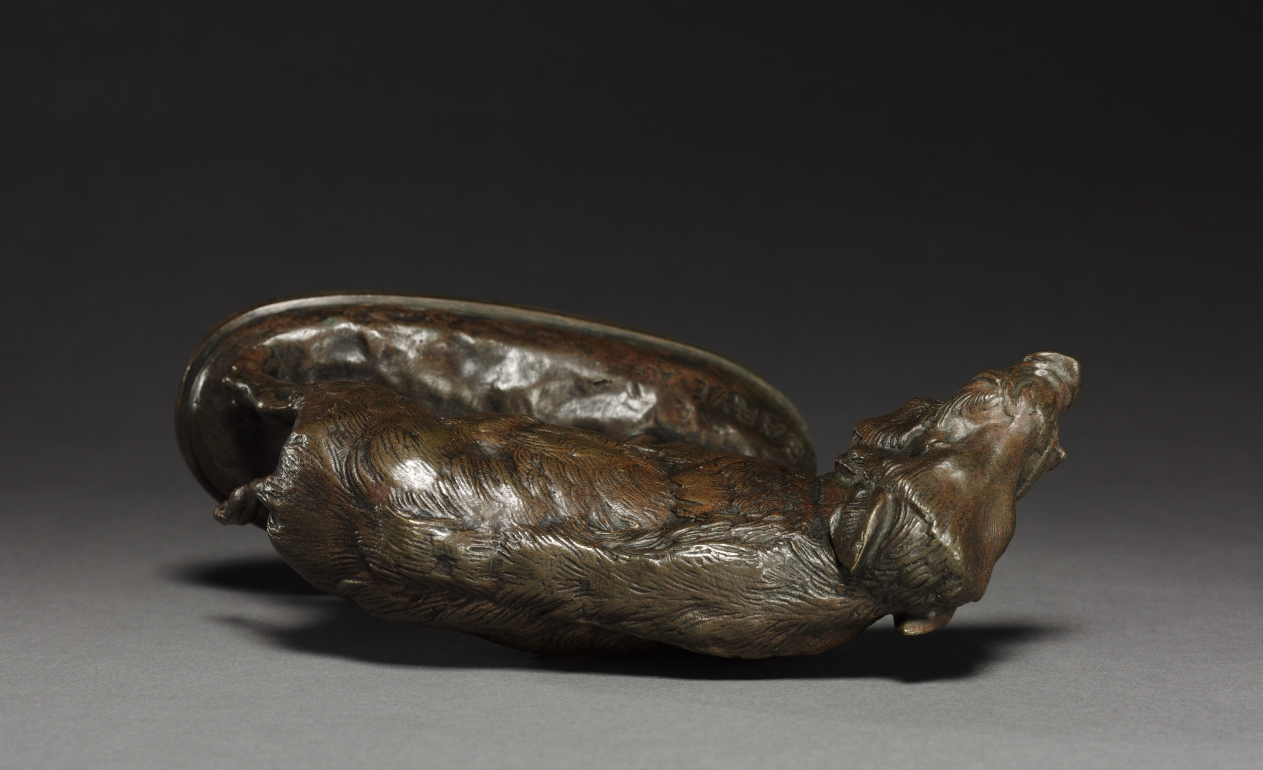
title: Wild Boar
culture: France, 19th century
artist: probably by Antoine-Louis Barye (French, 1796–1875)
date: 19th century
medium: bronze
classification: Sculpture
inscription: Signed" "Barye ALF" (...Foundry(?). On back of base: "C 808", in small letters